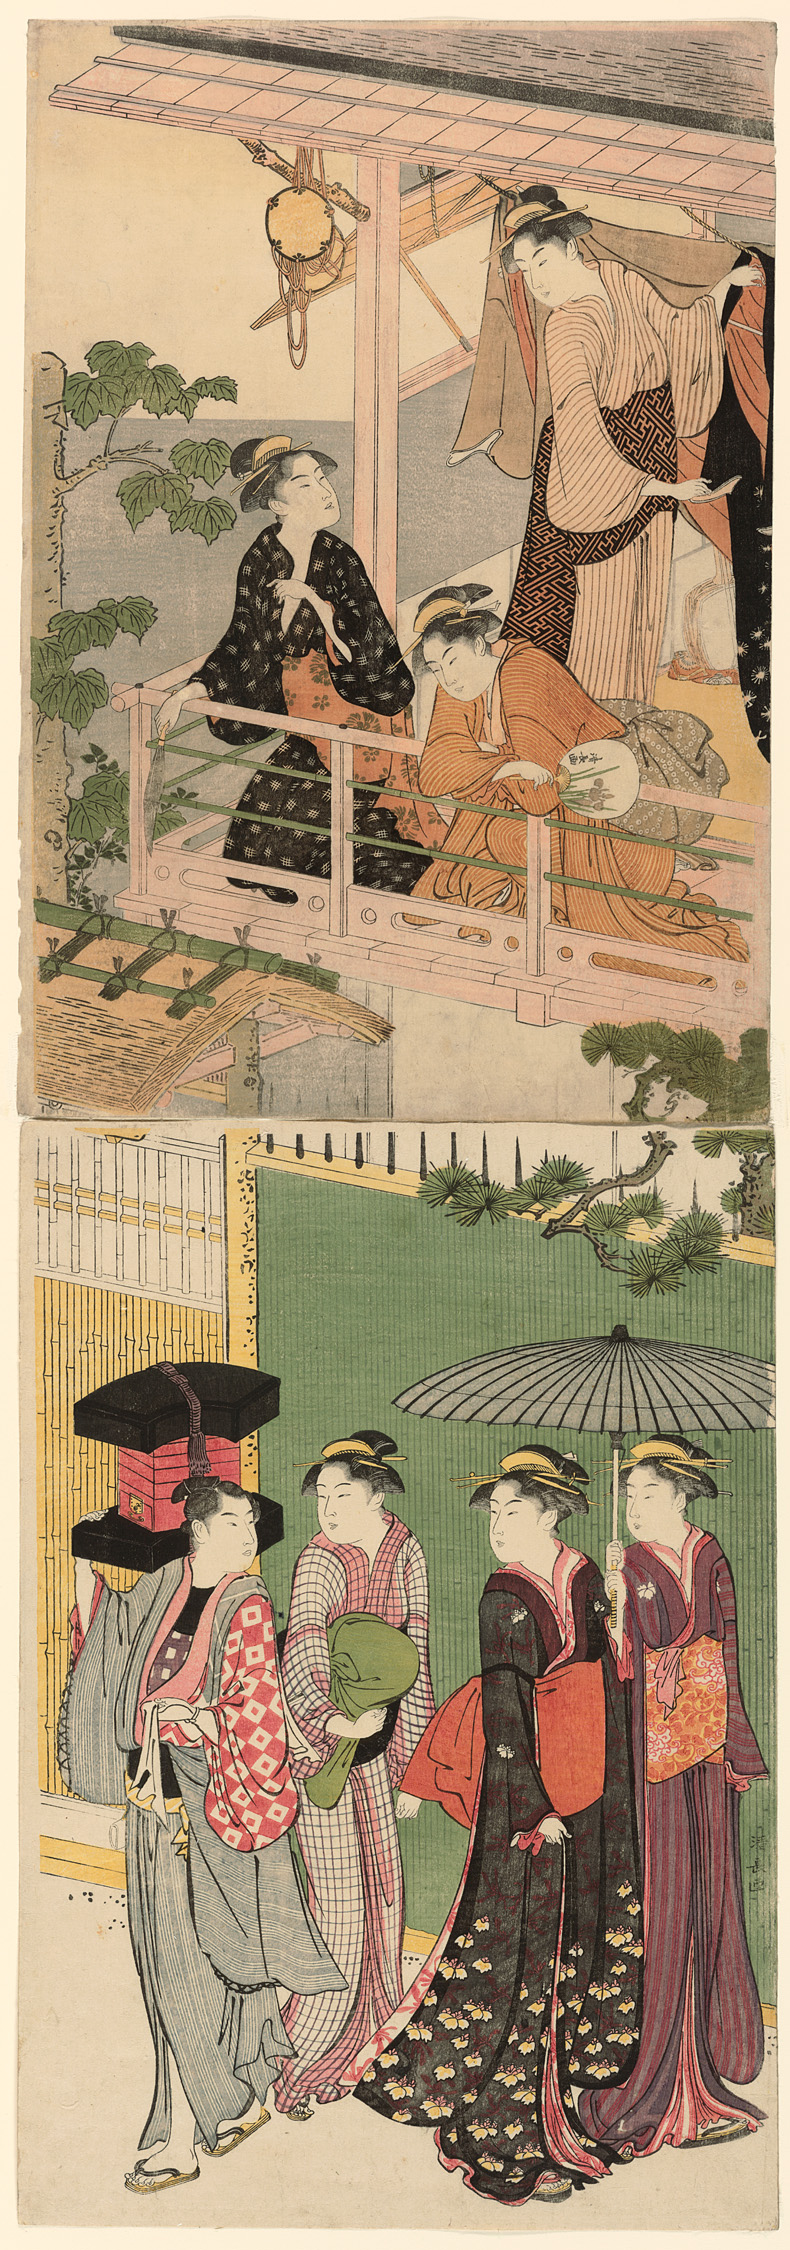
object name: Print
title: A Fan Peddler Passing Beneath a Balcony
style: Japanese (culture or style)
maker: Torii Kiyonaga (Japanese, 1752-1815)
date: c. 1786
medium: Color woodblock prints; vertical oban diptych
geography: Japan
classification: woodblock print; print; asian art